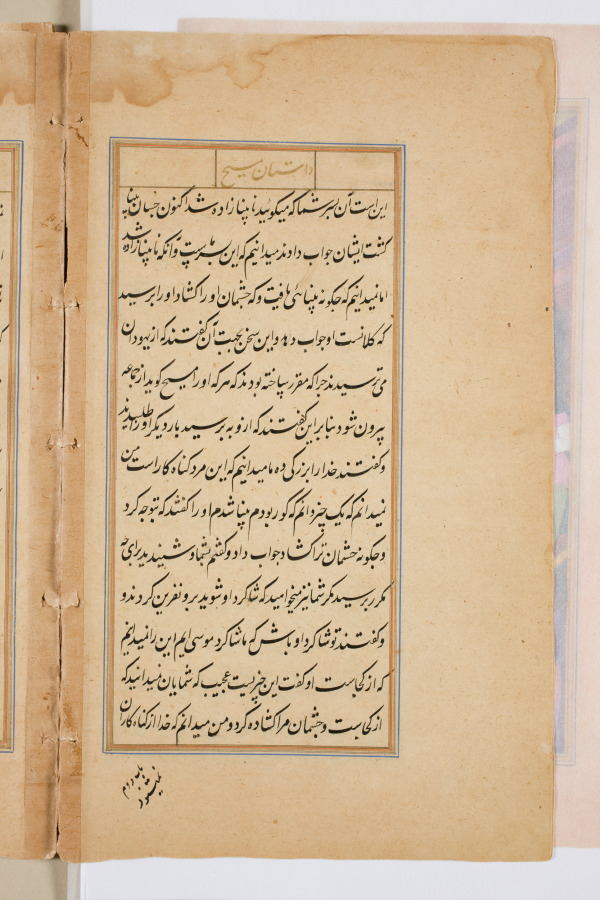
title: Text page from a Mirror of Holiness (Mir’at al-quds) of Father Jerome Xavier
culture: Mughal India, Allahabad, made for Prince Salim (1569–1627)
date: 1602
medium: Ink and gold on paper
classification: Manuscript